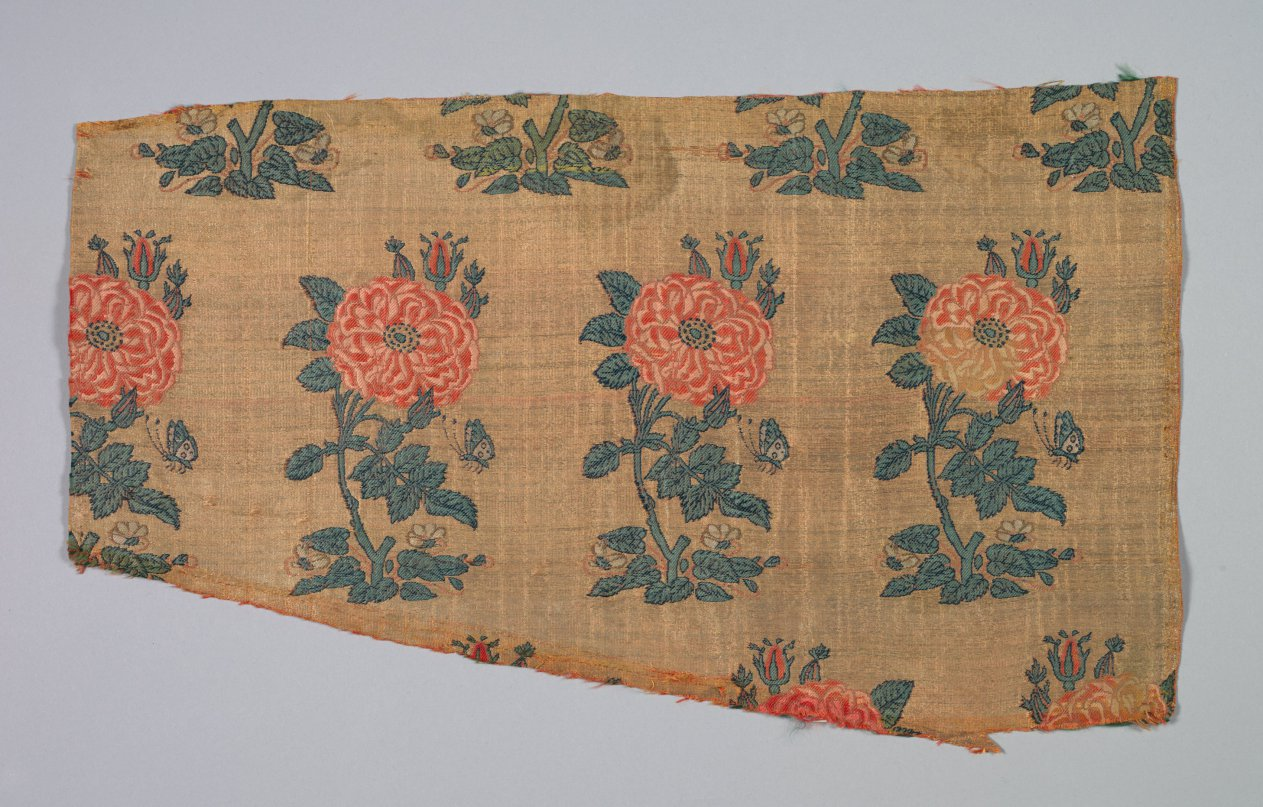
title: Sleeve with rose bushes and butterflies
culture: Iran, reign of Shah Abbas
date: early 1600s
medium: compound tabby ground with diasper pattern, brocaded; silk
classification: Textile